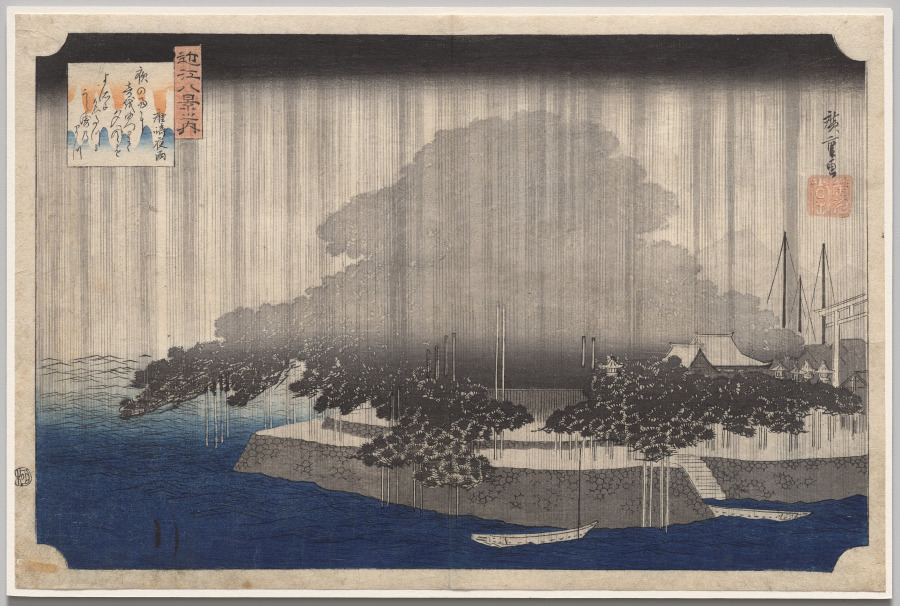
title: Night Rain at Karasaki, from Eight Views of Ōmi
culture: Japan, Edo period (1615–1868)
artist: Utagawa Hiroshige (Japanese, 1797–1858)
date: c. 1835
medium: color woodblock print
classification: Print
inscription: Signature: Hiroshige ga. Publisher: Yamamoto Heikichi (Eikyudo). Censorship Seal: kiwame.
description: The sacred Karasaki Pine was a famous sight on the shores of Lake Biwa. Its branches, supported by a framework of bamboo poles, sheltered a shrine beneath. The poem on this print reads as follows: Yielding to the sound in the evening rain, and drawing near to the evening wind, he grows famous, the pine tree of Karasaki. —Translation by Matthi Forrer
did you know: The rain is represented by fine, printed vertical lines.